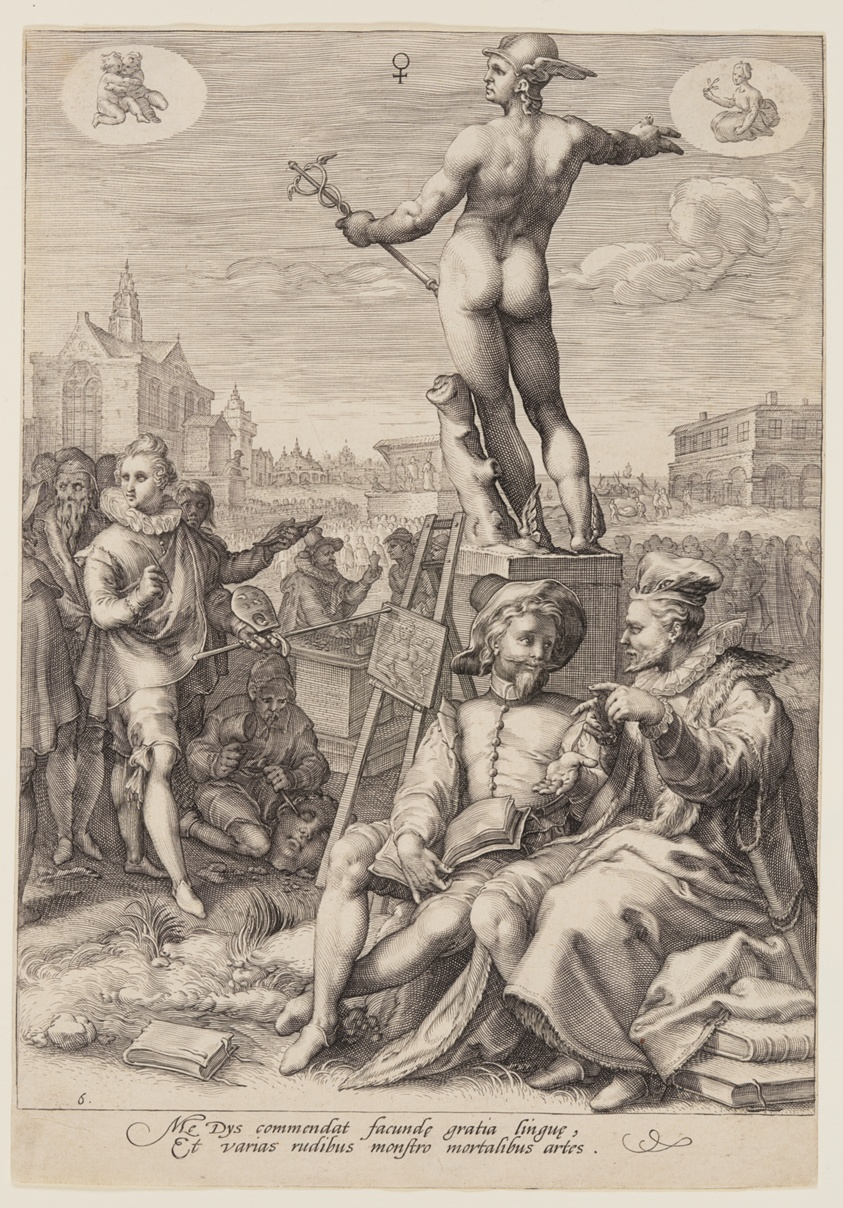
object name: Print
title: Mercury Presiding over the Arts, from Seven Planetary Gods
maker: Jan Saenredam (Dutch, 1565–1607); after Hendrick Goltzius (Dutch, 1558–1617)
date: 1596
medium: Engraving on ivory laid paper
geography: Netherlands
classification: engraving; paper; print; prints and drawing